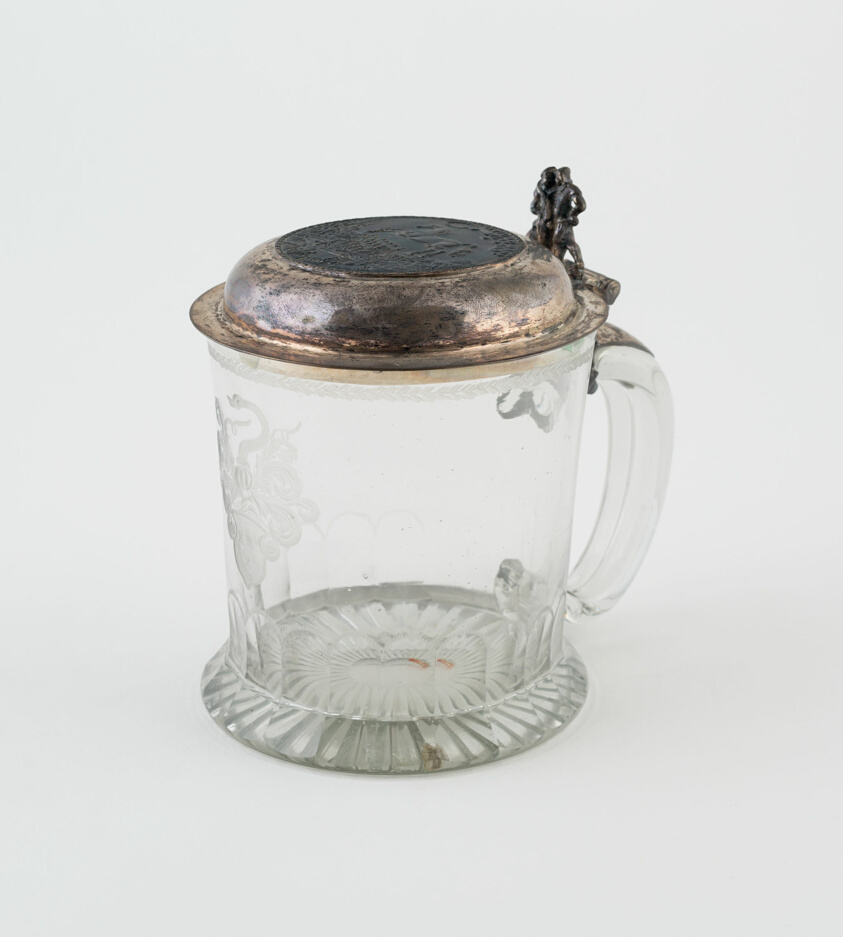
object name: Glass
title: Tankard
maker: Germany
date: c. 1730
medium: Glass with silver cover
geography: Germany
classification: drinking vessel; glass; european decorative arts